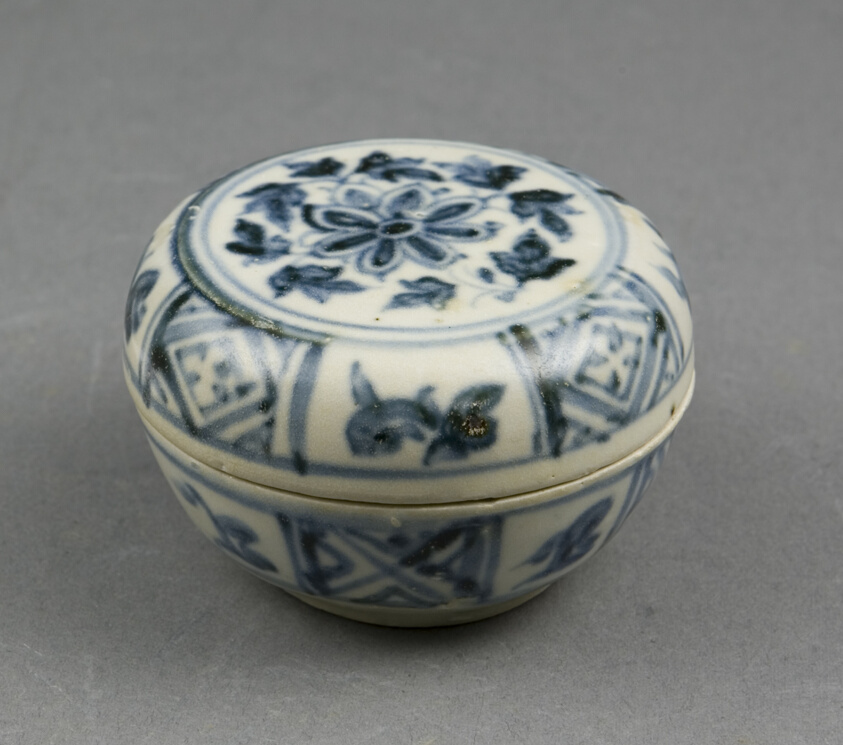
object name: Vessel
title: Miniature Covered Box with Chrysanthemum Spray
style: annamese, vietnamese, Southeast Asian, asian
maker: Vietnam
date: 15th century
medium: Glazed stoneware with cobalt-blue underglaze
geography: Vietnam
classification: ceramics; asian art; vessel